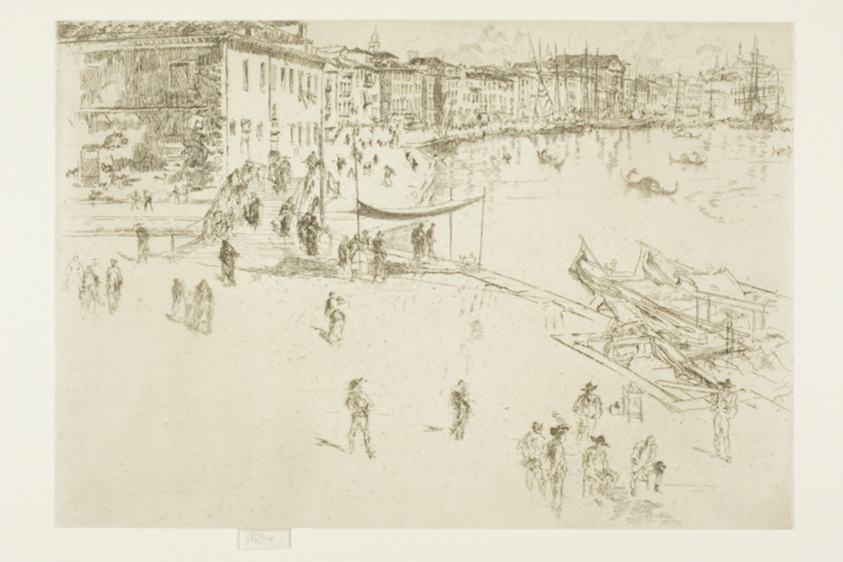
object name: Print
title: Riva, No. 2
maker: James McNeill Whistler (American, 1834-1903)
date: 1879/80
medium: Etching and drypoint with foul biting in brown ink on ivory laid paper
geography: United States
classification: etching; drypoint; print; prints and drawing; foul biting; paper